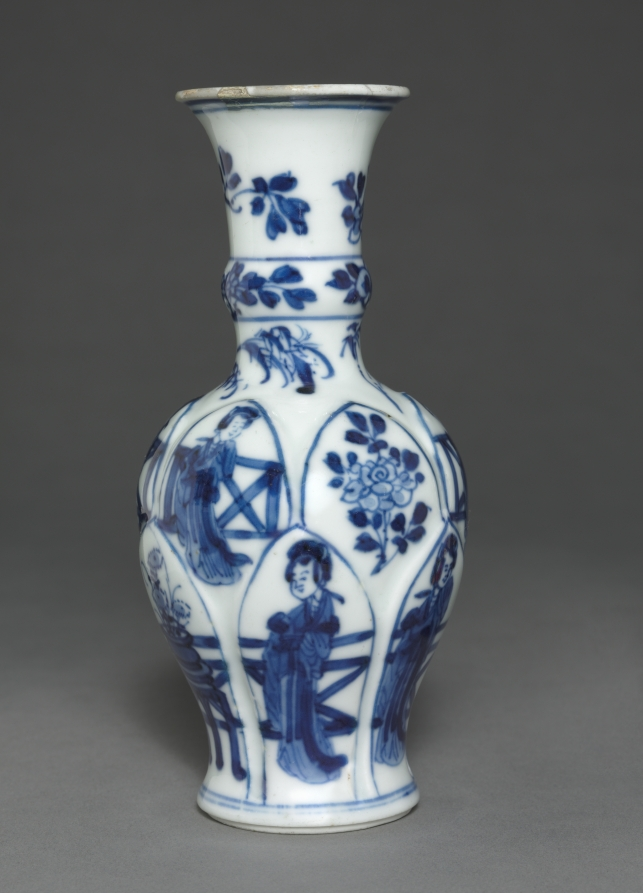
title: Vase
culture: China, Qing dynasty (1644-1911), Daoguang reign (1821-1850) - Xianfeng reign (1851-1861)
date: 19th Century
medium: porcelain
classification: Ceramic